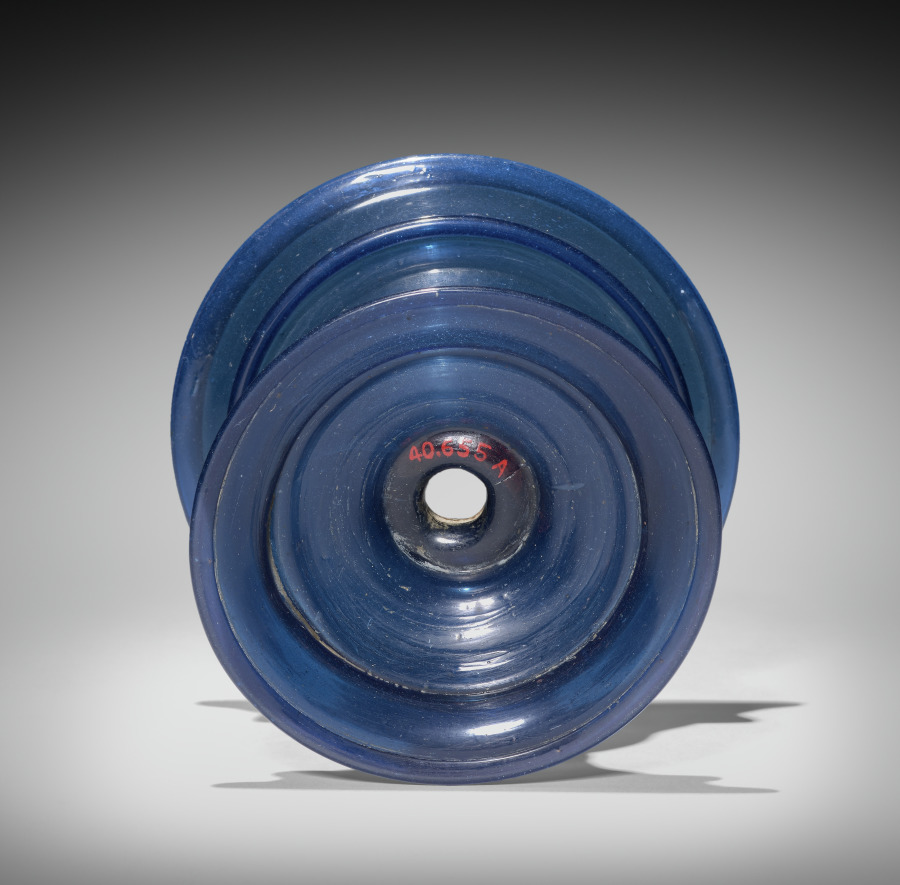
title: Bowl with Stand (stand)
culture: Syria, Roman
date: 100–400 CE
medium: glass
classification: Glass